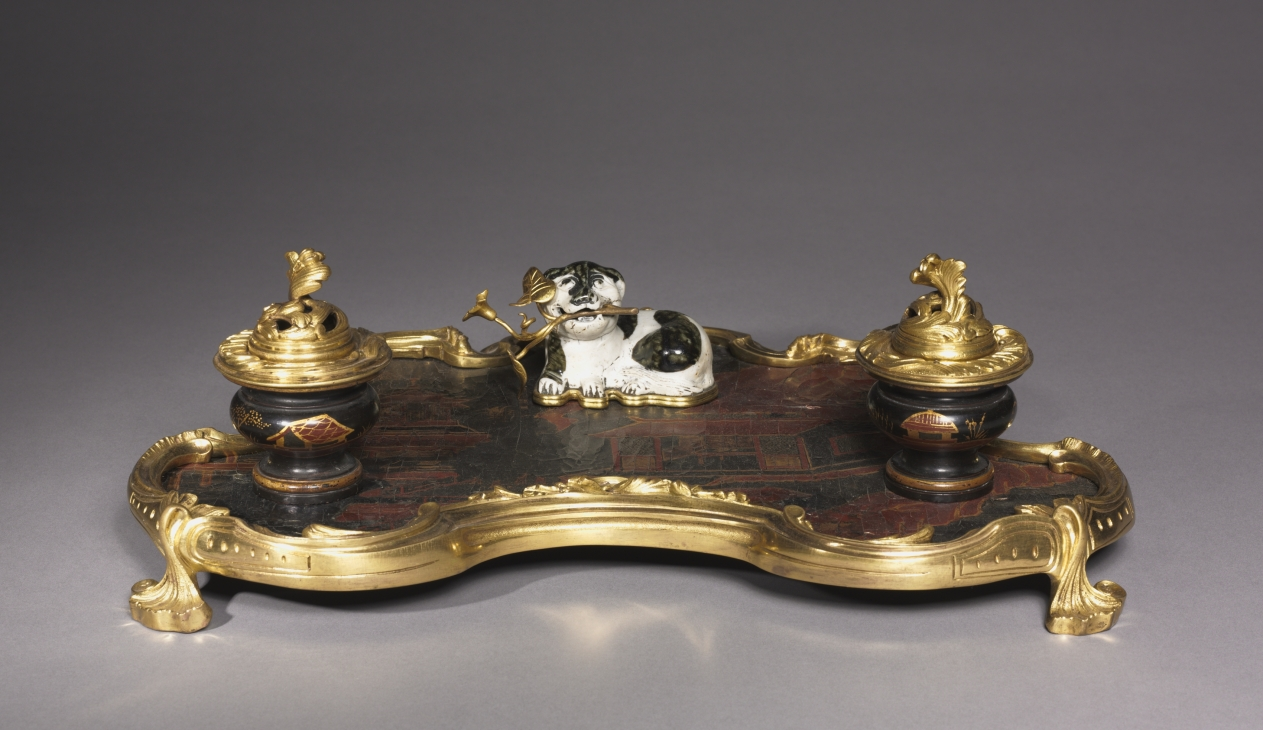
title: Inkstand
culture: France, mid-18th century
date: c. 1745–1749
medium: ormolu and lacquer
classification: Miscellaneous